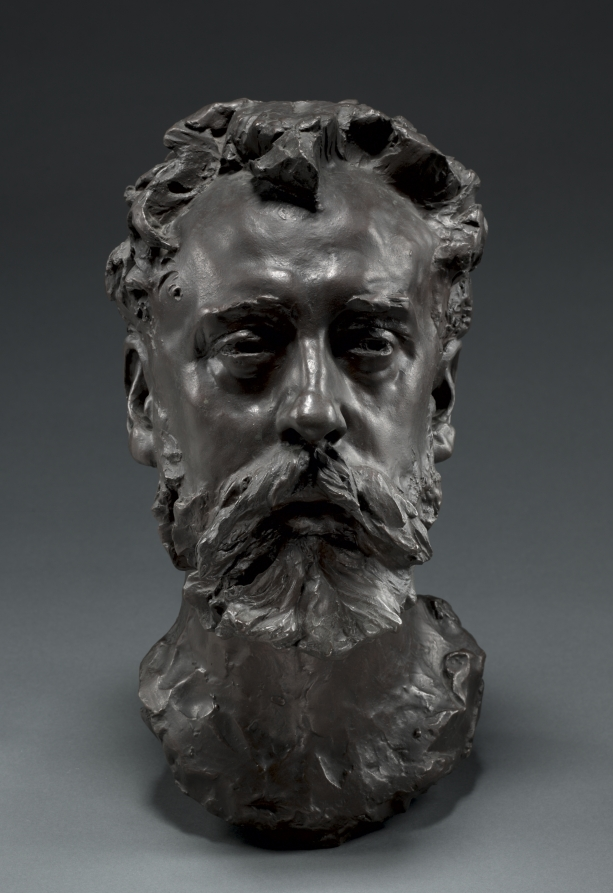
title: Portrait of William E. Henley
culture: France, 19th century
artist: Auguste Rodin (French, 1840–1917)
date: 1882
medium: bronze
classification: Sculpture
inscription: inscribed on back: Rodin.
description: A poet and dramatist, William Henley (1849–1903) was the editor of the British Magazine of Art from 1882 to 1886. He enthusiastically introduced Rodin's sculpture to his readers, even before the artist's work was well known in Paris. To thank him, Rodin made this bust.